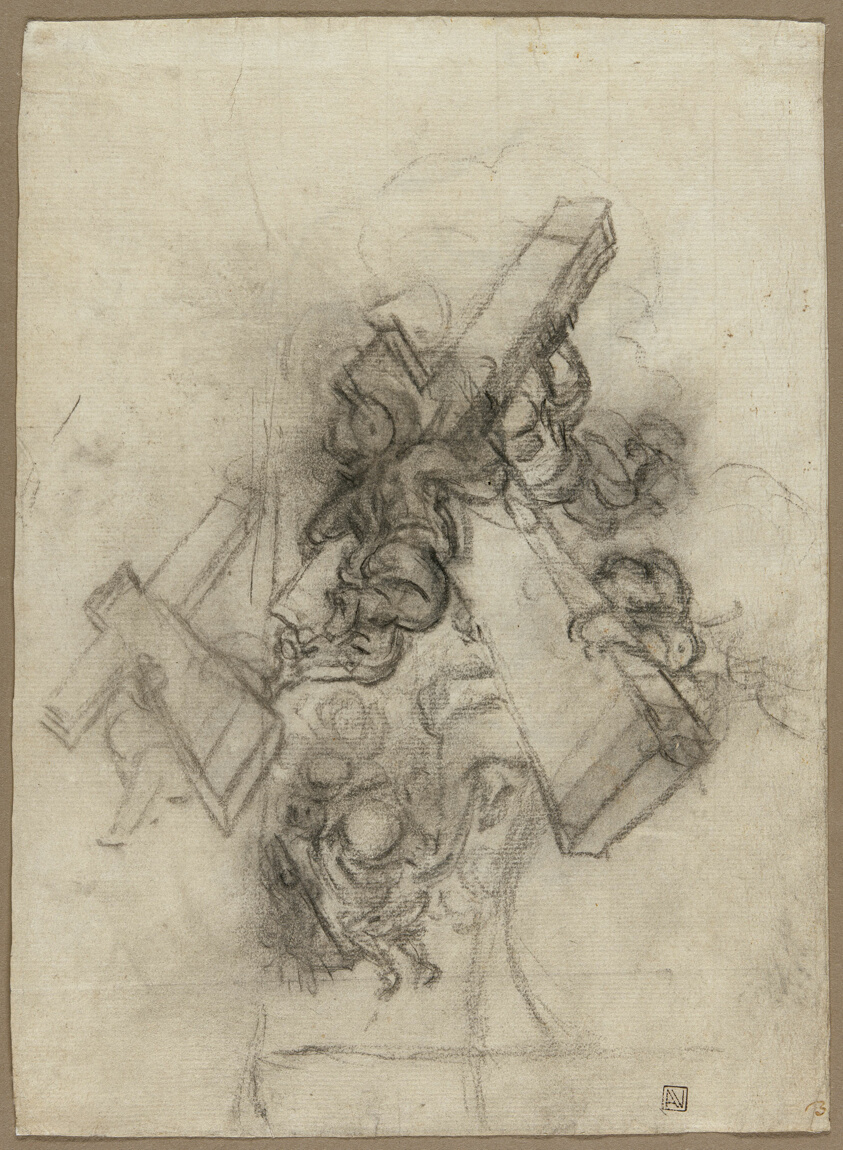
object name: Drawing and Watercolor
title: Putti Carrying the Cross (recto); Studies of a Hand (verso)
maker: Gian Lorenzo Bernini (Italian, 1598-1680)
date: 1672/75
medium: Charcoal and black chalk, with stumping (recto); black chalk (verso) on ivory laid paper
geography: Italy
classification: chalk; drawings (visual works); prints and drawing